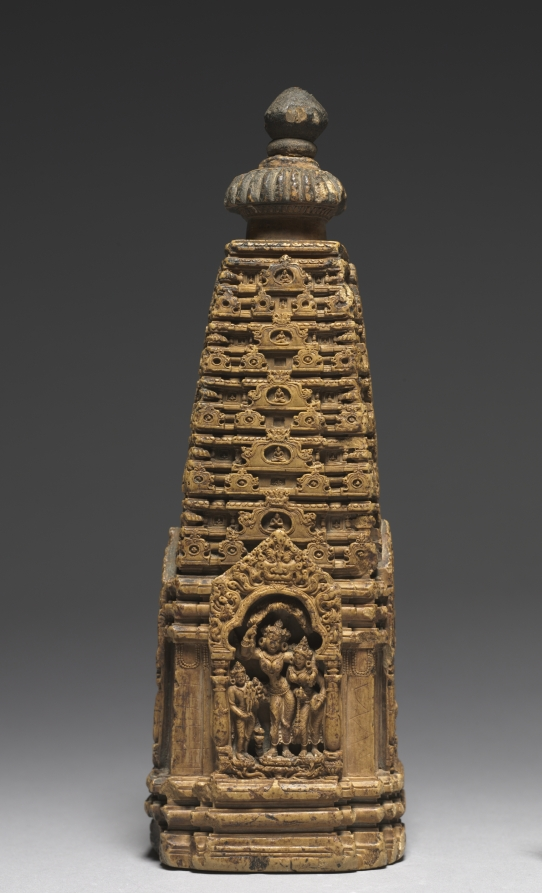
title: Portable Buddhist Temple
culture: Eastern India, Bihar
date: 900s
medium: Kaolin with traces of pigment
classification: Sculpture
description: The large niches on each side contain scenes from the life of the Buddha. The first features his mother Maya after his miraculous birth. The second and fourth depict his triumph over the forces of evil that attempted to frighten and seduce him away from the path to enlightenment. The third scene takes place after he has established a monastic following and depicts his wife bringing their son to meet him. Kaolinite is a compacted mineral that approximates ivory in its ability to be carved with fine details. Visitors to sacred Buddhist sites would commission portable sculptures such as this to commemorate their pious pilgrimage.